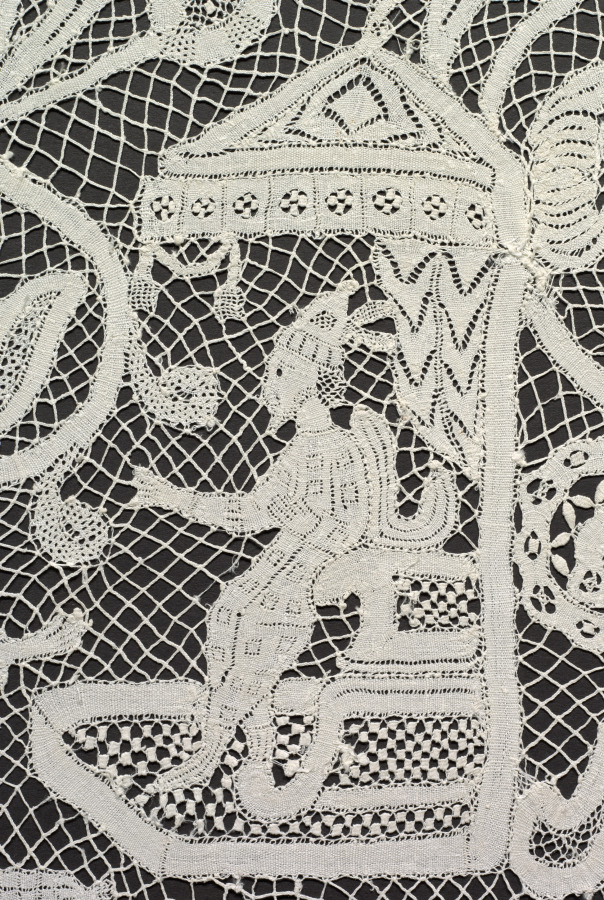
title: Lace Flounce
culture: Italy, Milan(?)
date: 1750–99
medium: Linen: bobbin lace (Punto di Milano)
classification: Lace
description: Being the most prestigious material, lace was used extensively by the 1600s for altar linen and for trimming priest’s albs, often incorporating finely rendered religious images amid blossoming vines. This alb flounce depicts scenes from the Old Testament story of Joseph, whose jealous brothers sold him to a caravan bound for Egypt. Joseph later interpreted dreams of the pharaoh, who made him ruler. When famine in Canaan caused Joseph’s ten brothers to travel to Egypt in search of food, they bowed down to him. After he revealed his identity, he forgave his brothers and God saved the family.